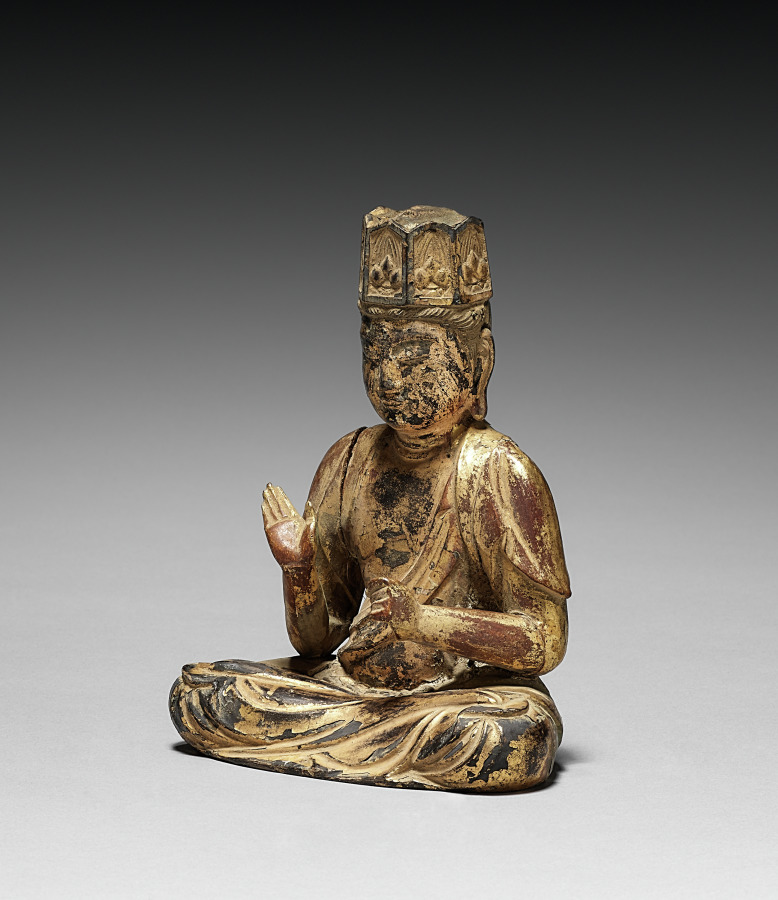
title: Bodhisattva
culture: Japan, Heian period (794–1185)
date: 900s-1100s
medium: gilded wood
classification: Sculpture